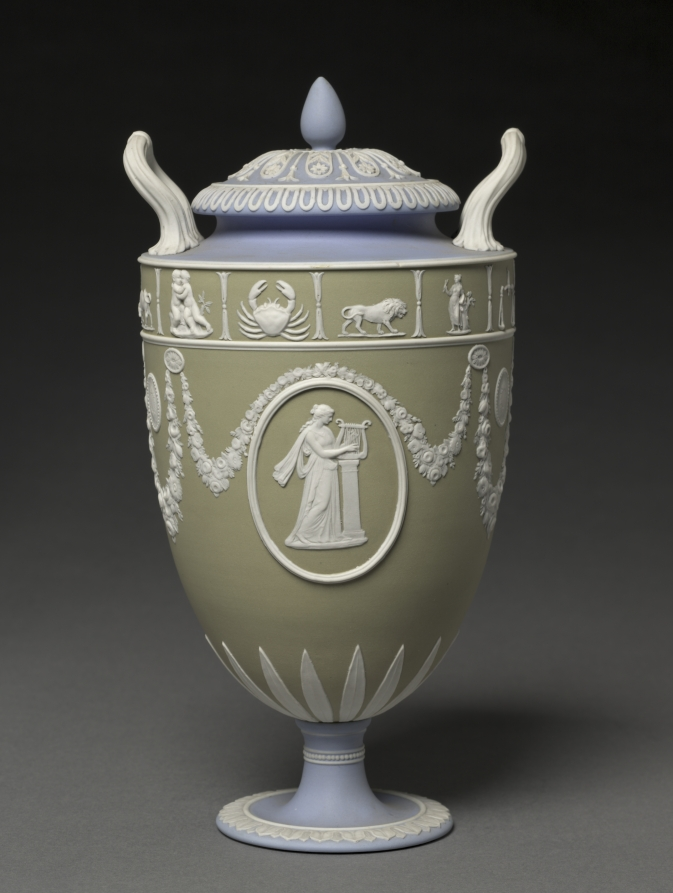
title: Covered Vase (one of a pair)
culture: England, Staffordshire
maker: Josiah Wedgwood and Sons (British, Staffordshire, est. 1759)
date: c. 1850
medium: jasper ware with relief decoration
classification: Ceramic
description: Wedgwood's tricolor jasperware first became popular in the 1770s during a period of fascination with neoclassical decoration. This vase was probably made around 1850 during the period when this type of decoration was revived. The relief medallions depict two versions of the Greek god Apollo, the god of music, next to his harp or lyre.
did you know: Signs of the zodiac form a decorative border around the upper portion of this vase.